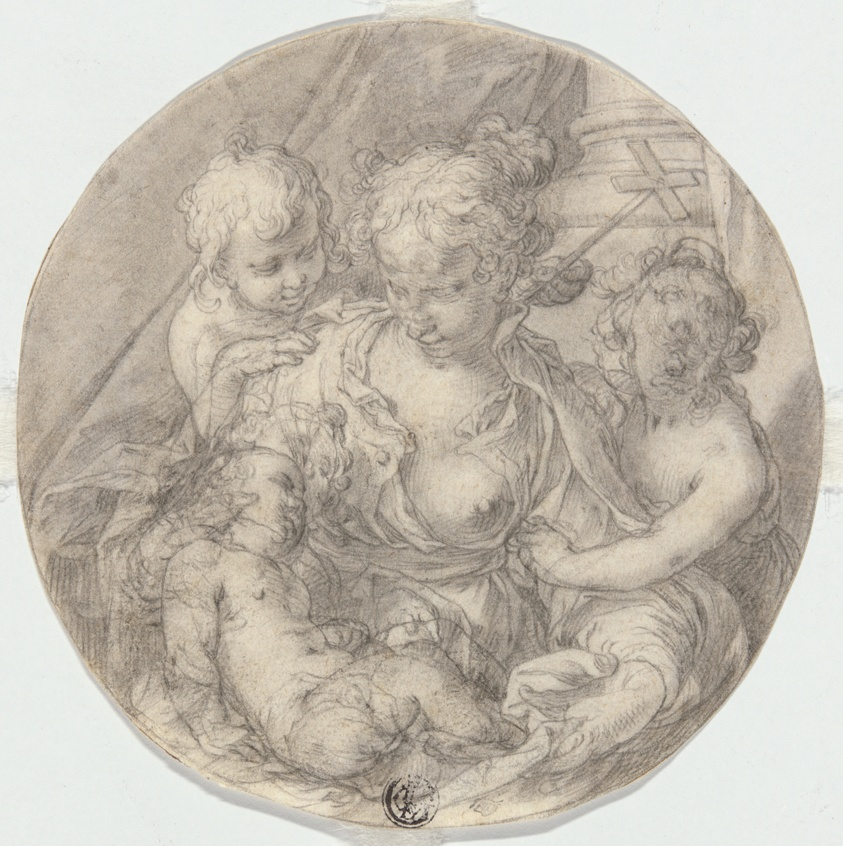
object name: Drawing and Watercolor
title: The Madonna with the Christ Child, with the infant John the Baptist and another Child (Caritas)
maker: Attributed to Joachim Anthonisz. Wtewael; (Dutch, 1566-1638)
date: c. 1595-1605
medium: Black chalk on ivory laid paper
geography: Netherlands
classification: chalk; drawings (visual works); prints and drawing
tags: mothers, children, babies